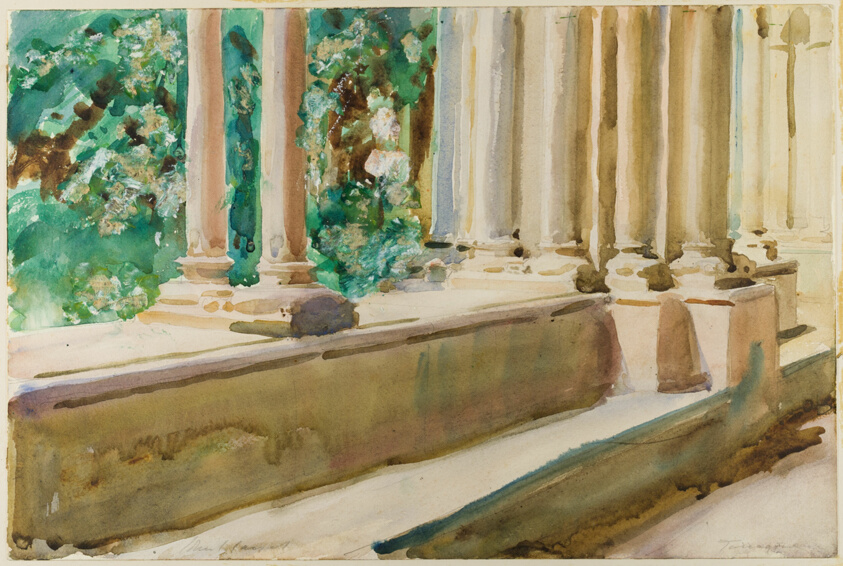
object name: Drawing and Watercolor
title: Tarragona Terrace and Garden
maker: John Singer Sargent (American, 1856-1925)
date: c. 1908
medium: Watercolor and opaque watercolor with printed paper fragments over traces of graphite on ivory wove paper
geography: United States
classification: watercolor; drawings (visual works); prints and drawing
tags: gardens